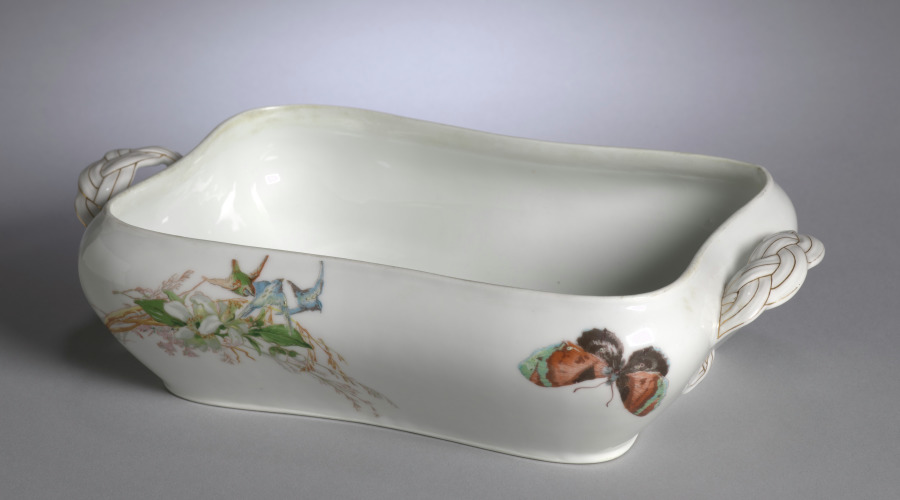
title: Vegetable Bowl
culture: France, Limoges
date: c. 1890–1910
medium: porcelain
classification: Ceramic